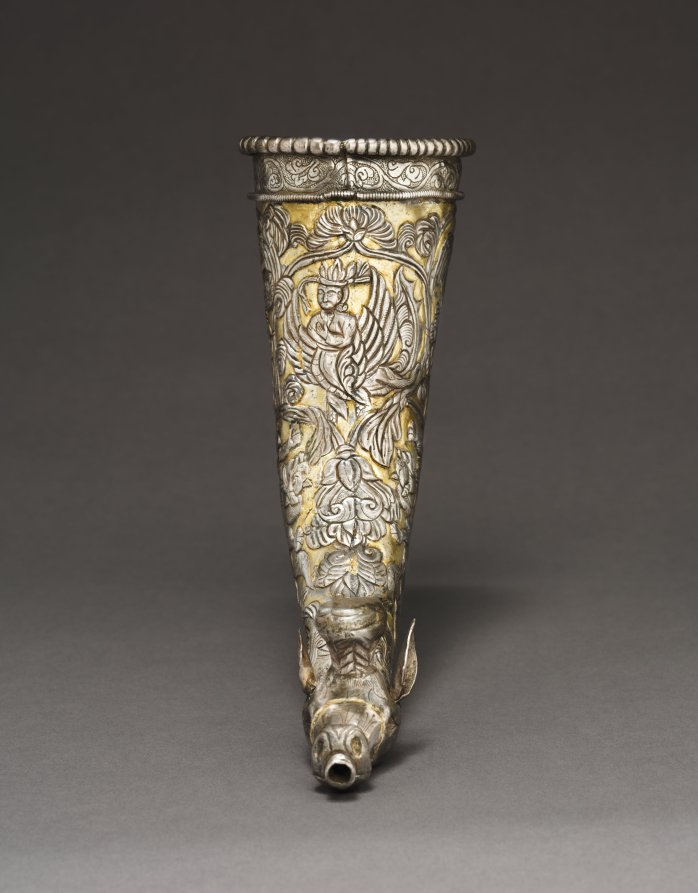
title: Rhyton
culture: Central Asia (Sogdiana) or Tibet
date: c. late 600s–early 700s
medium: silver with gilded foil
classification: Silver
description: The form of the animal-headed rhyton as a drinking vessel and the use of silver are evidence of cultural exchange with Persia, while the lush, luxurious quality of the design and the form of the lions and curling dragon on one side of the decanter reveal an awareness of Chinese forms. Poured into the large opening at the top of the horn, wine then flowed out through the small tube held between the parted lips of a bovine-like animal. To keep from spilling, drinkers could stop the flow of the liquid by holding a thumb over the lower aperture.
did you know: This drinking horn was a communal vessel which guests would pass around to share wine at parties.